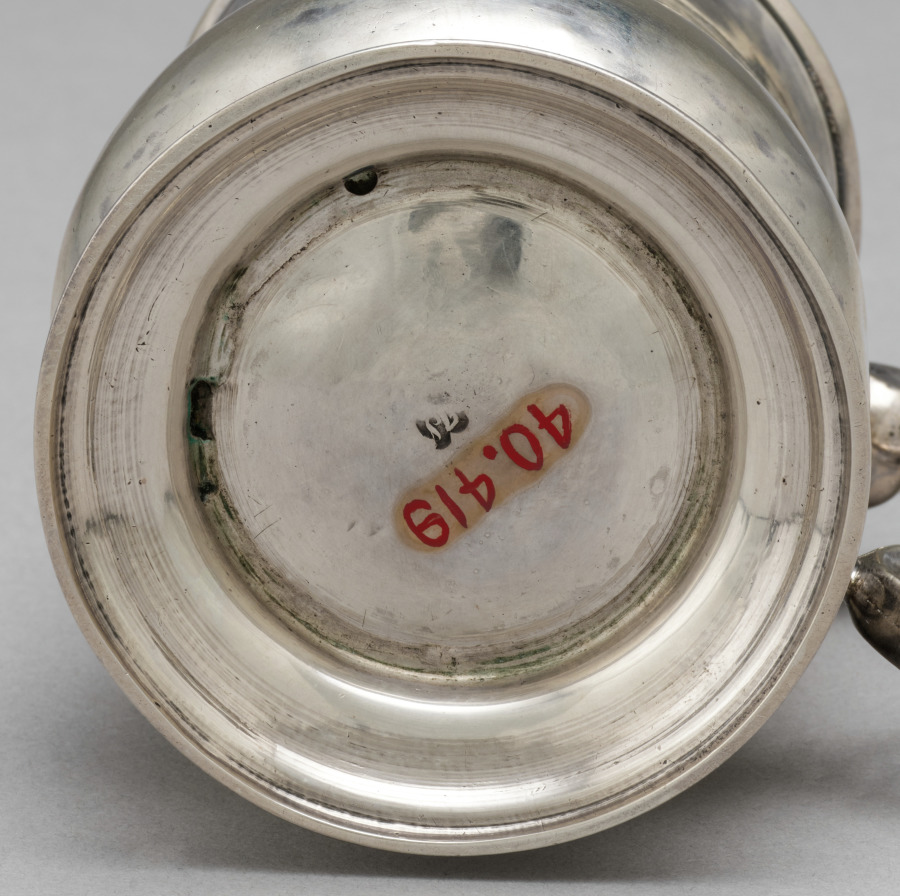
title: Cann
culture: America, Maryland, Baltimore, 18th century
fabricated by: Thomas Sparrow (American, 1746-)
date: c. 1770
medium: silver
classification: Silver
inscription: engraved "JSR" in foliate script on front, opposite handle.